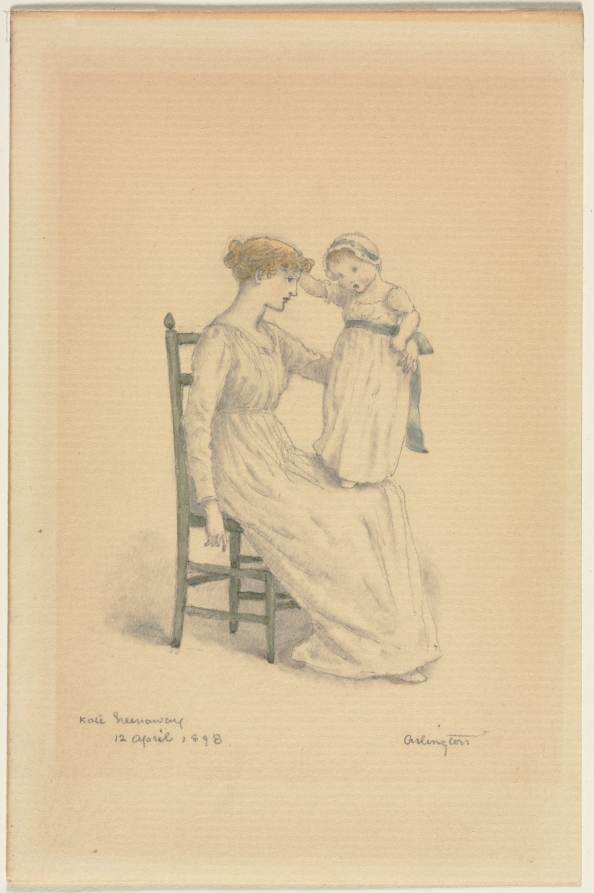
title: Mother and Child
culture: England, 19th century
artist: Kate Greenaway (British, 1846–1901)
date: 1898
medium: graphite and watercolor on paper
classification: Drawing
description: This tender moment between a mother and her child is characteristic of Kate Greenaway’s idealized images of childhood. Working in the late 1800s, Greenaway depicted clothing vaguely inspired by the fashion of the early 1800s, suggesting that the image was from a moment in an idealized past when things were simpler and happier. Greenaway was one of the most successful female illustrators of her time. Her illustrations were used not only in children’s books but also in a variety of consumer products, including calendars, address books, plates, and textiles, and even influenced children’s fashion.